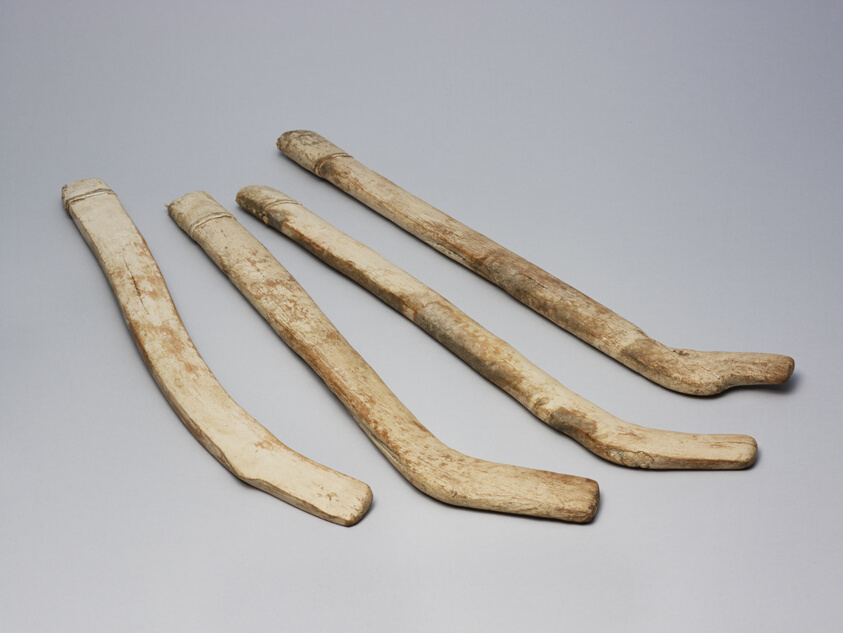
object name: Religious/Ritual Object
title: Ritual Cache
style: salado, mimbres, mogollon, americas, southwest, native american, native north american, Arts of the Americas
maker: Salado branch of the Mogollon; New Mexico, United States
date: 1300–1400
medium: Wood, stone, plant fibers, cotton, feathers, hide, and pigment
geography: New Mexico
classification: ceremonial object; ceramics; masks; ritual objects; art of the americas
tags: ceremonial objects, figures (representations), snakes, ritual objects, mountain lions, indigenous, nature, altar, offering, feathers, corn, lightning, fertility, supernatural, basketry, hunting